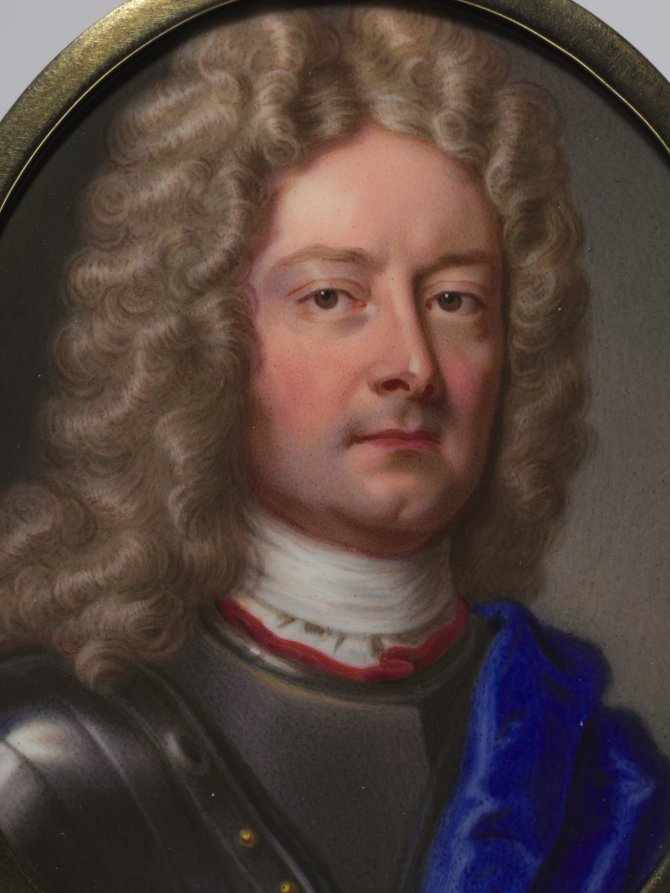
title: Portrait of John Churchill, 1st Duke of Marlborough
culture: England, 18th century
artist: Christian Friedrich Zincke (German, 1683/85–1767)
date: 1715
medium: enamel on copper in a gilt metal frame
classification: Portrait Miniature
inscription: signed on back: CF Zincke fecit/ 1715. [CF in monorgram].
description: Unlike fragile portrait miniatures painted in watercolor on vellum or ivory, which are prone to cracking, fading, and flaking, enamels are resilient, impervious to the effects of light, and retain their striking original colors over time. Partly for this reason enamel was considered ideal for reproducing famous paintings and treasured portraits in a reduced and luminous form. The complicated and labor-intensive process of enameling required the artist to fire numerous layers of colored metal oxide at different temperatures, which made it difficult to produce a faithful portrait likeness, though masters of the medium were able create portraits of remarkable subtlety imbued with the sitter's personality. The heyday of enamel painting was the late 1600s and early 1700s. Among the enamel specialists was Zincke, who worked in England where he was patronized by Queen Anne, King George I, and King George II.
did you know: Although miniatures are often regarded as a private art form exchanged between loved ones, the nature of this enamel was likely political.